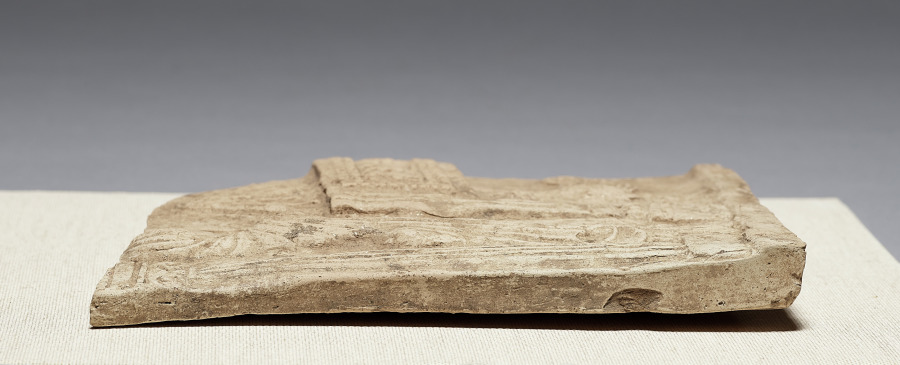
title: Votive Plaque (Pinax) with Persephone Making her Bridal Bed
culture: West Greek/South Italian, Classical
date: c. 490–450 BCE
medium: Terracotta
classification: Plaque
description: Probably once brightly painted, this relief plaque belongs to a series of votive dedications made in Locri Epizephirii, near the “toe” of Italy, to the goddess Persephone (or Kore), daughter of Demeter. Following her abduction by Hades, god of the Underworld, Persephone regularly returned to earth, dictating the seasons and making agriculture possible. Often, as here, the plaques show domestic scenes.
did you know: The rooster often appears with Persephone on such plaques, perhaps because both mark transitions.